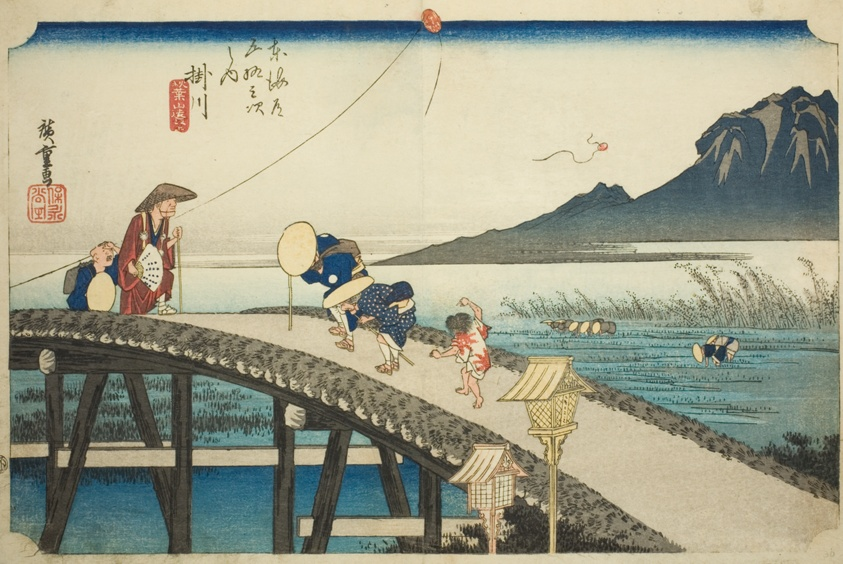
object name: Print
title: Kakegawa: Distant View of Mount Akiba (Kakegawa, Akibasan enbo), from the series "Fifty-three Stations of the Tokaido (Tokaido gojusan tsugi no uchi)," also known as the Hoeido Tokaido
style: Japanese (culture or style)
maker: Utagawa Hiroshige 歌川 広重; Japanese, 1797-1858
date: c. 1833/34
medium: Color woodblock print; oban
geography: Japan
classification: woodblock print; print; asian art